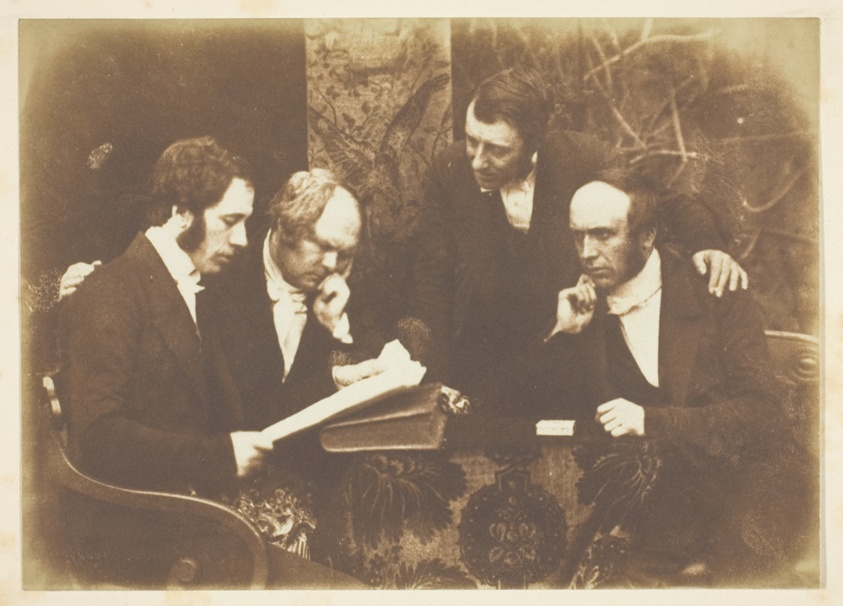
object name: Photograph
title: Dumbarton Presbytery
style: 19th century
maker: David Octavius Hill (Scottish, 1802–1870) and; Robert Adamson (Scottish, 1821–1848)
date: March 29, 1845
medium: Salted paper print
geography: Scotland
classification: salted paper print; photograph; photography